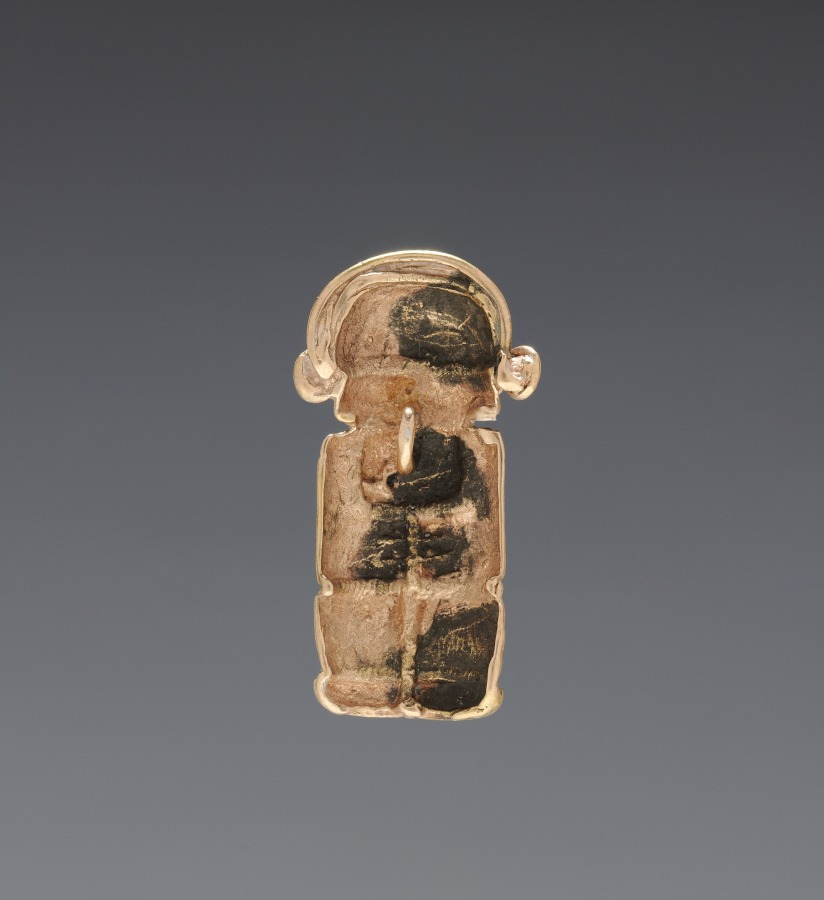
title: Necklace Figurine Bead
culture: Colombia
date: 1–700 CE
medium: cast gold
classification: Jewelry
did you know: Working with gold dates back to at least 500 BC in Ecuador and Colombia.